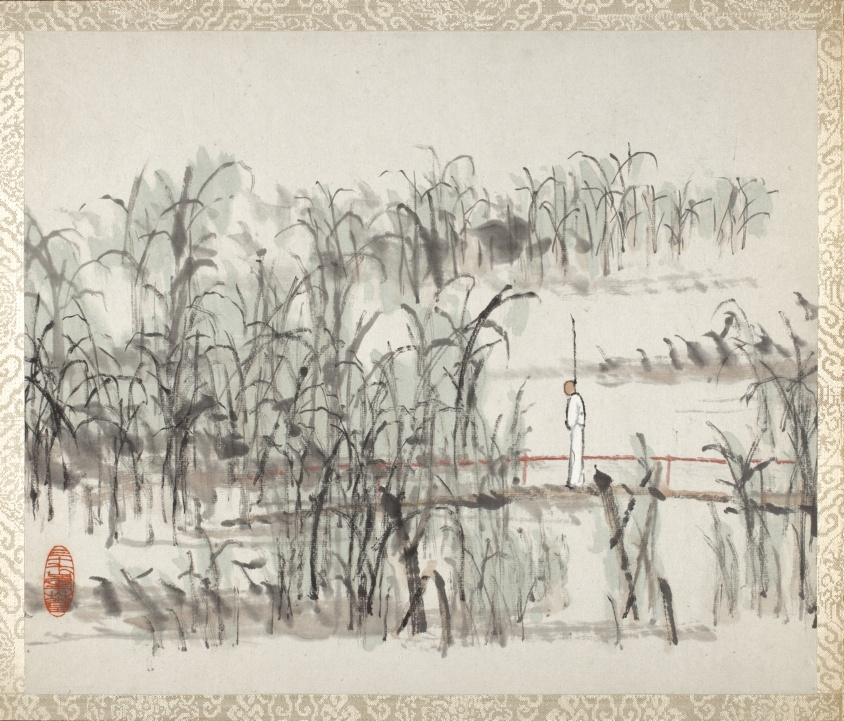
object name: Painting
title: Album of Landscapes and Calligraphy for Liu Songfu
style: Chinese (culture or style)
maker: Xugu 虛谷 (Chinese, 1823-1896)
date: Qing dynasty (1644–1911), 1895/96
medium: Album leaves; ink and color on paper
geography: China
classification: painting; album leaf